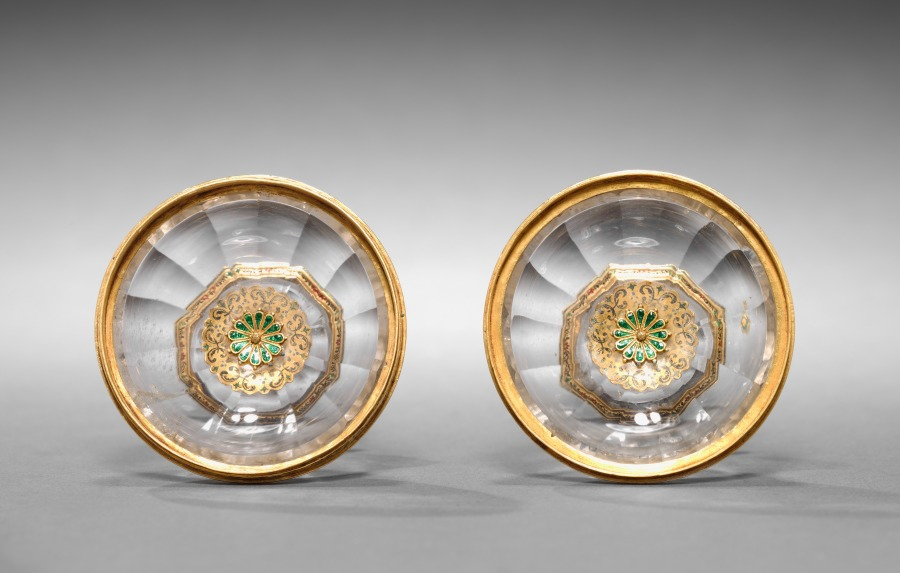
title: Double Cup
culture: Italy, late 16th century (possibly 19th century forgery, or 16th and 19th century pastiche)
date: late 16th century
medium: rock crystal set in enameled gold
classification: Enamel